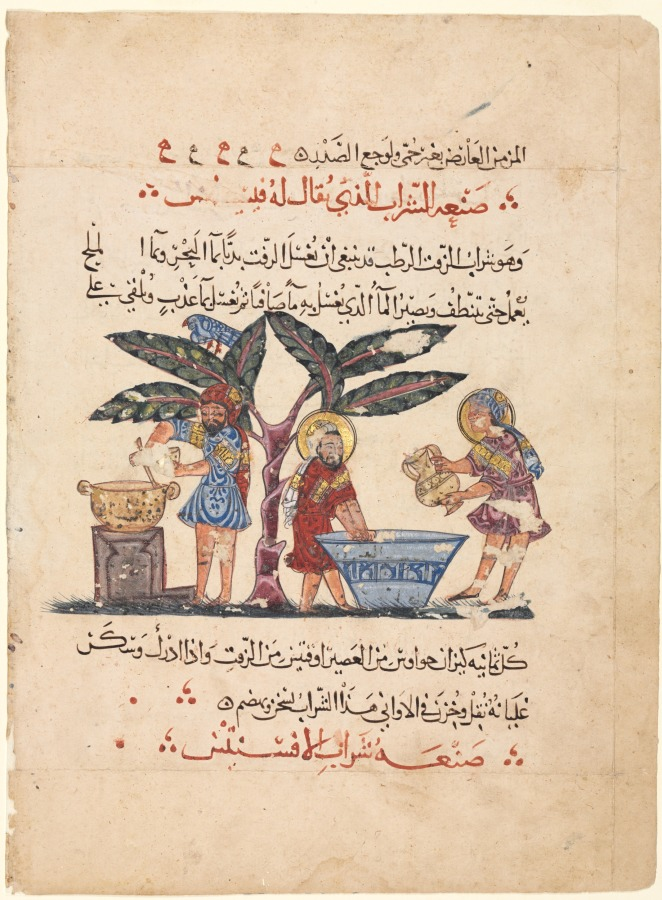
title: Folio from an Arabic translation of the Materia Medica of Dioscorides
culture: Iraq, Baghdad, Abbasid Period, 13th Century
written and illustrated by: Abdallah ibn al-Fadl (Iraq)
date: 1224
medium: ink, opaque watercolor, and gold on paper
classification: Manuscript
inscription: Script: Naskh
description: This page is from an herbal, an illustrated book on the properties of plants. Herbals were among the first manuscripts of the Islamic world to include painted figural imagery. The lines in red are titles signaling how to make a particular kind of medicine. Initially written in Greek by a physician working for the Roman imperial army in what is present-day Turkey during the 1st century AD, the text was translated into Arabic during the 800s for a caliph who sponsored many translations of Greek scientific and philosophical treatises. This copy entered the royal Topkapi Palace library in Istanbul, from where 33 of its illustrated pages were dispersed to various collections. The first recipe on the text page describes the production of a syrup used for coughs, chronic diarrhea, and the treatment of syphilis in women. It states that the herb wormwood should be added to give it a more pleasant smell. The second recipe is for a syrup made from pine nuts, and the third is used to relieve chest pains and coughing without fever. The painting on the reverse depicts a physician in red and his two assistants preparing a medicinal syrup thought to be good for digestion. In accordance with the instructions on the page, tar in the consistency of dough is to be washed in salt water, then plain water. The artist has shown the washing taking place in a great basin. The syrup is then boiled, as seen on the left, and ladled into a bowl for storage.